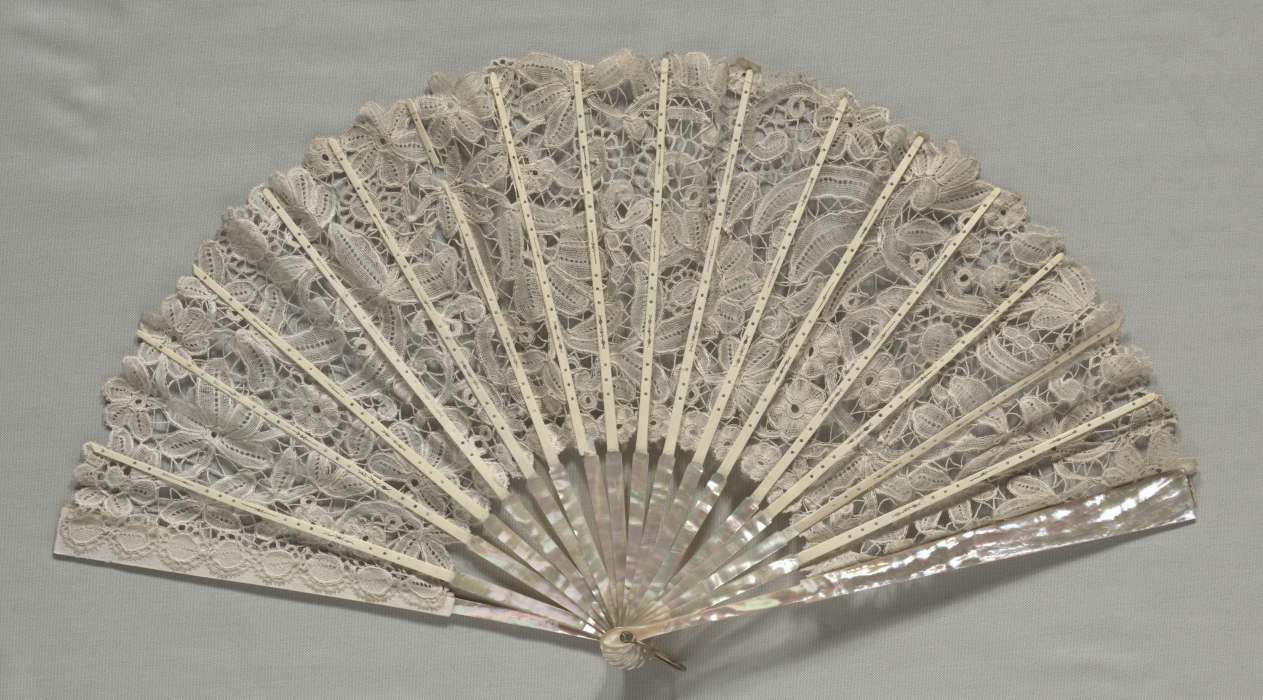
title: Lace Fan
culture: Belgium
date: c. 1860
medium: Linen: bobbin lace (Brussels); frame: mother-of-pearl and ivory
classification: Lace